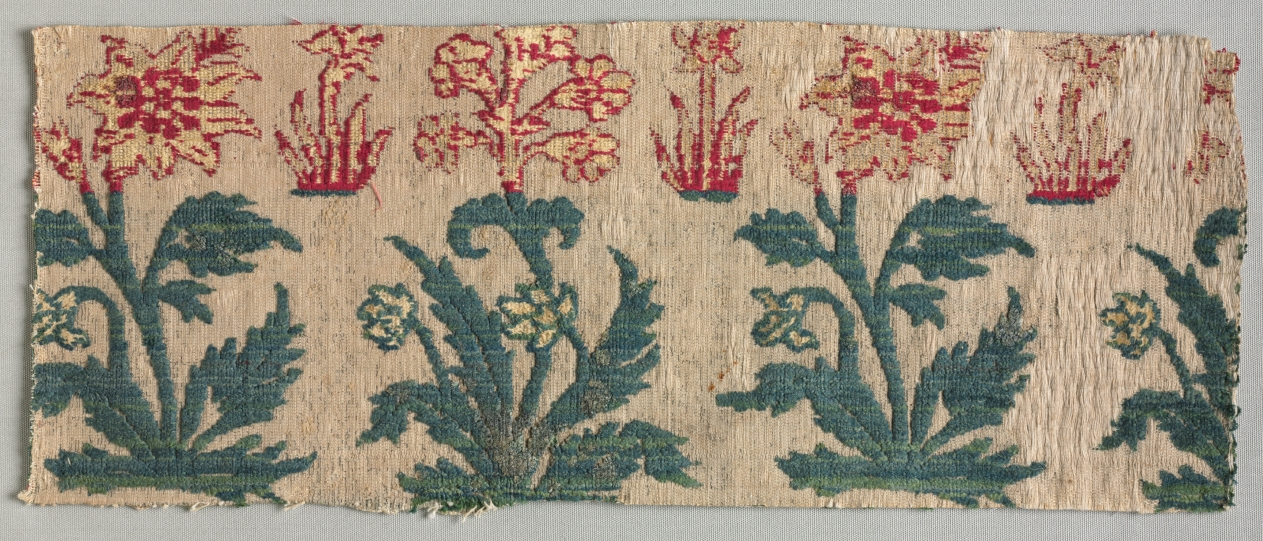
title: Velvet Fragment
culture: India, 17th century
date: 1600s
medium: velvet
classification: Velvet